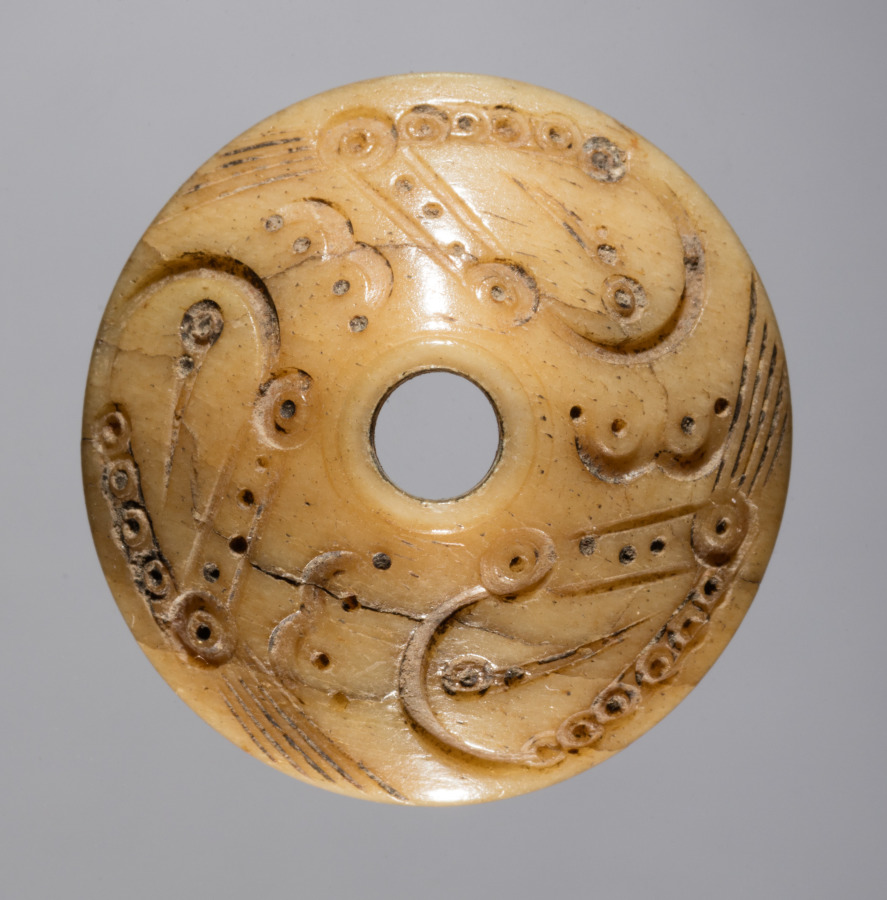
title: Spindle Whorl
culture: Iran, early Islamic period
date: 700s - 900s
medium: bone, incised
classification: Spindle Whorl